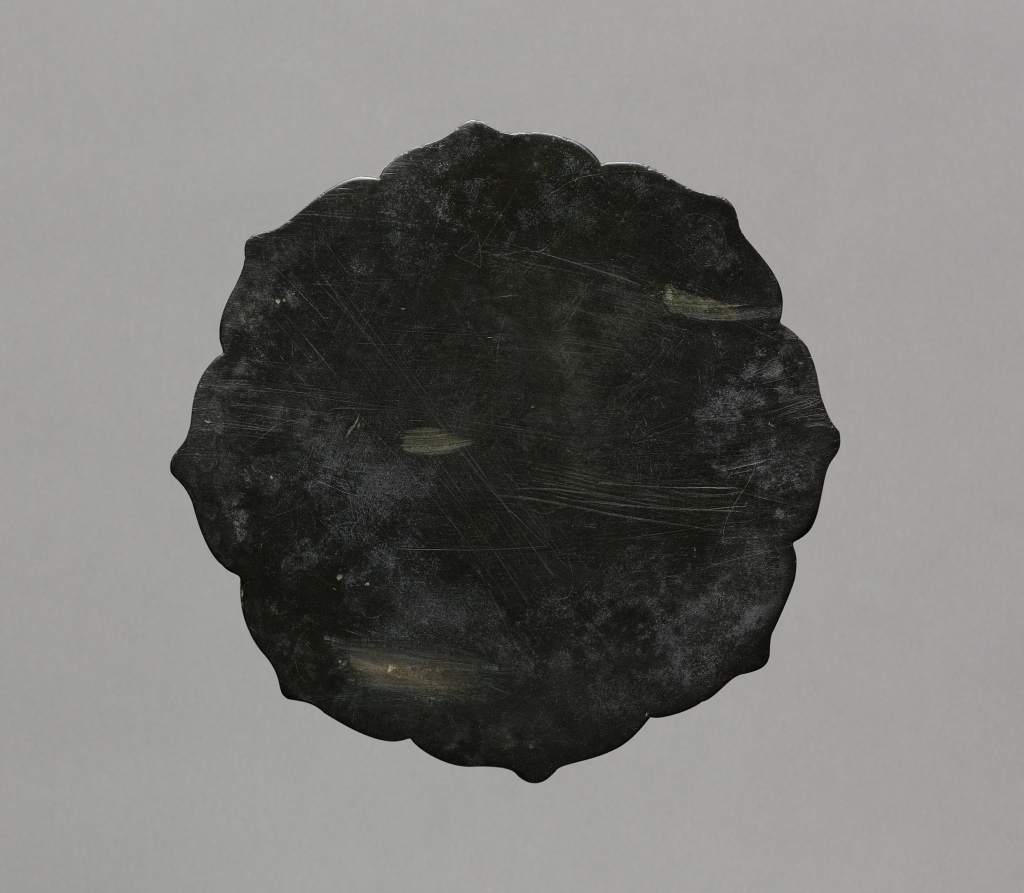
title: Mirror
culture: Japan, Heian period (794–1185)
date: 794–1185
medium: bronze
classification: Metalwork